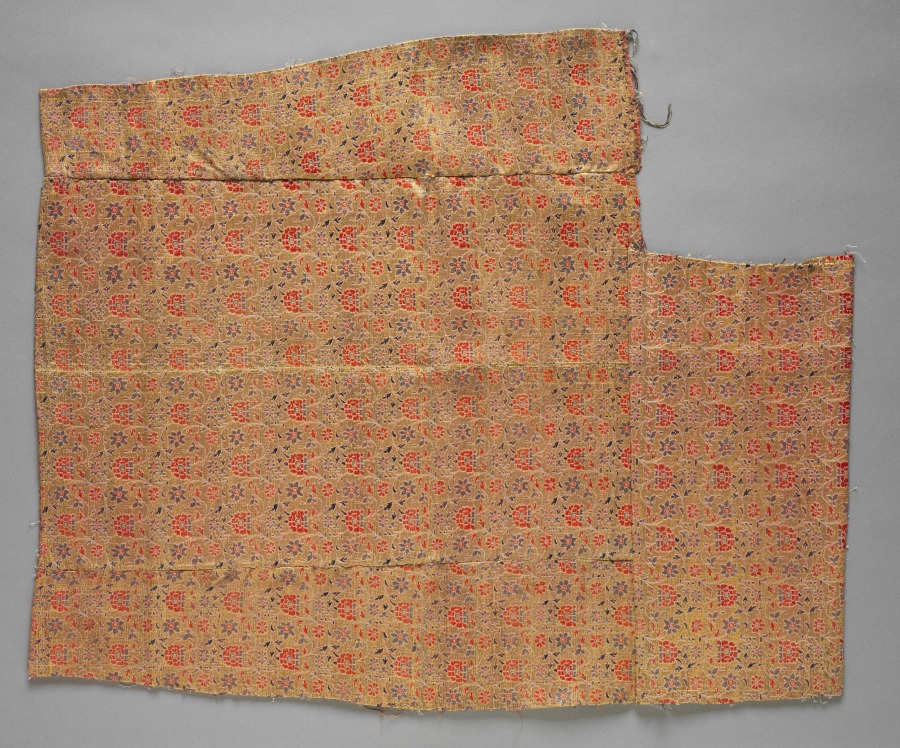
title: Fragments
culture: Iran, 18th century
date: 1700s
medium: silk, brocaded, with metal thread weft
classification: Textile